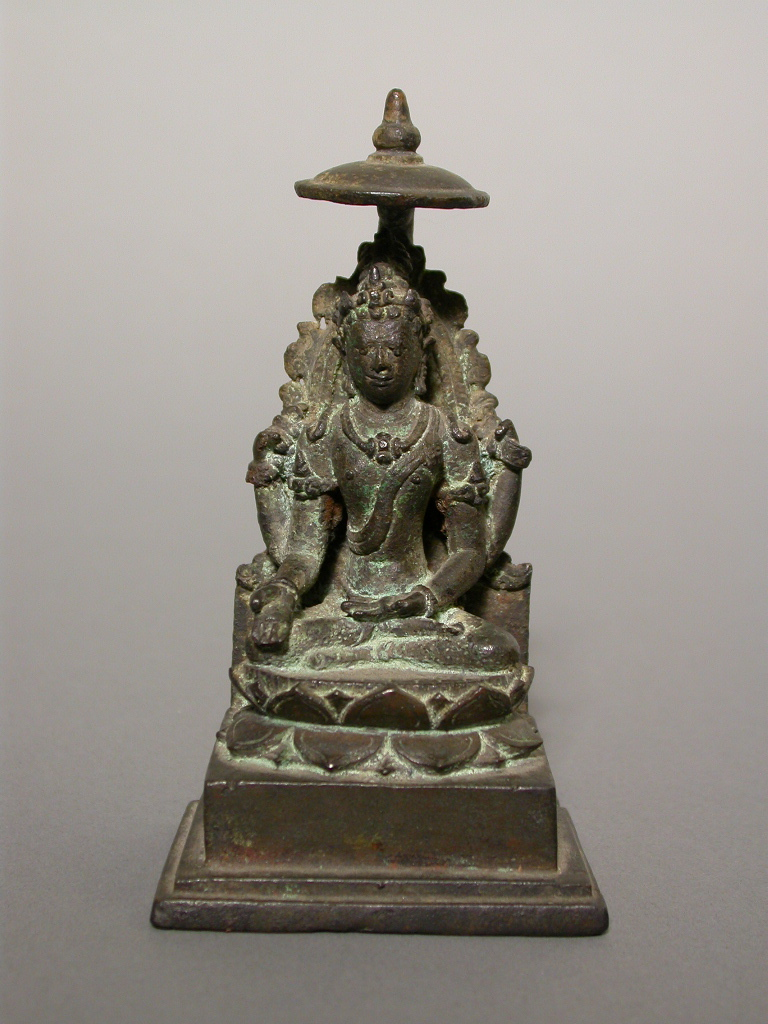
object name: Sculpture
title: Four-Armed Bodhisattva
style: Southeast Asian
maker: Indonesia; Central Java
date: 9th/10th century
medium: Bronze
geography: Central Java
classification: bronze; metal; sculpture; asian art